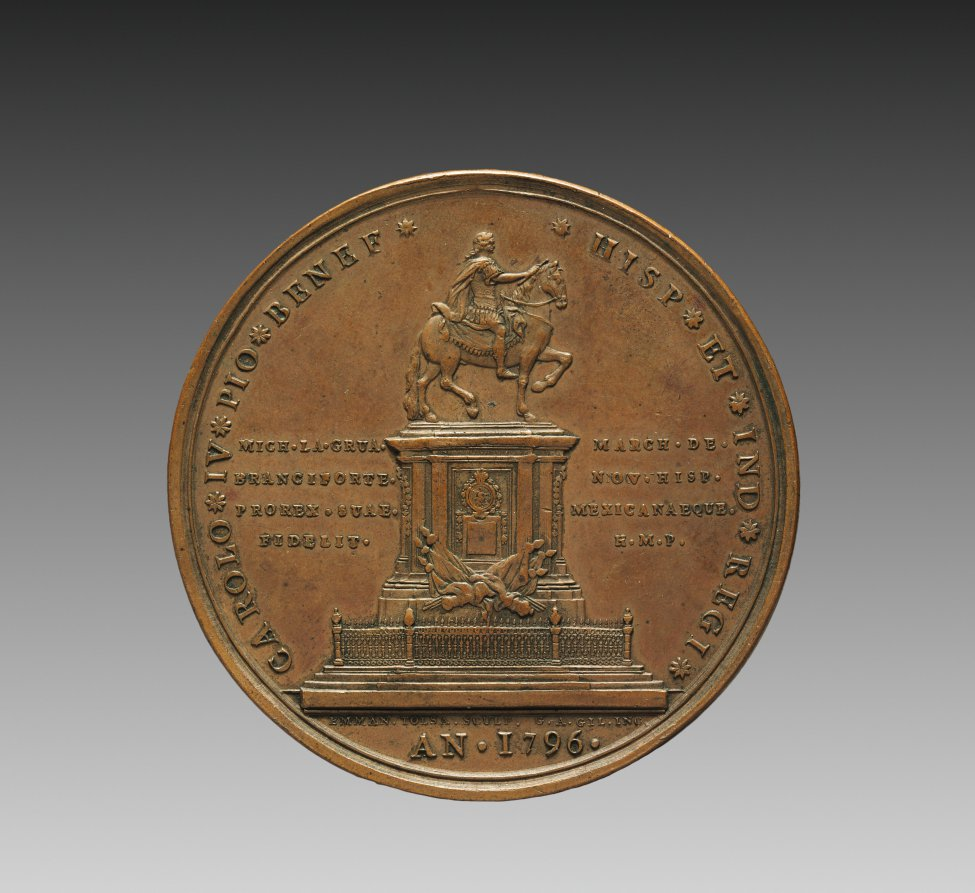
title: Portrait of Charles IV, King of Spain, and María Luisa, Queen Consort of Charles IV (reverse)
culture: Spain, late 18th century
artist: Manuel Tolsá (Spanish, 1757–1816)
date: 1796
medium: bronze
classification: Sculpture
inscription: "CAROLO IV PIO BENEF HISP. ET. IND. REGI. AN 1796."